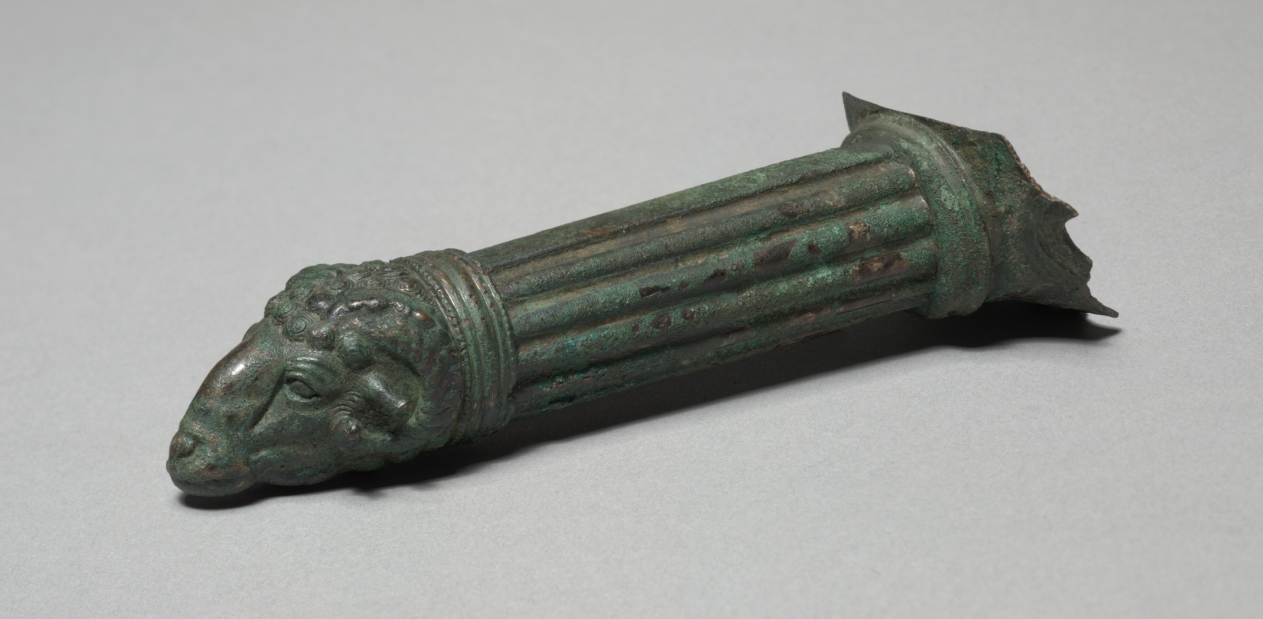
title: Patera Handle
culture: Greece, late Hellenistic period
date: 200–1 BCE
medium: bronze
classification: Metalwork